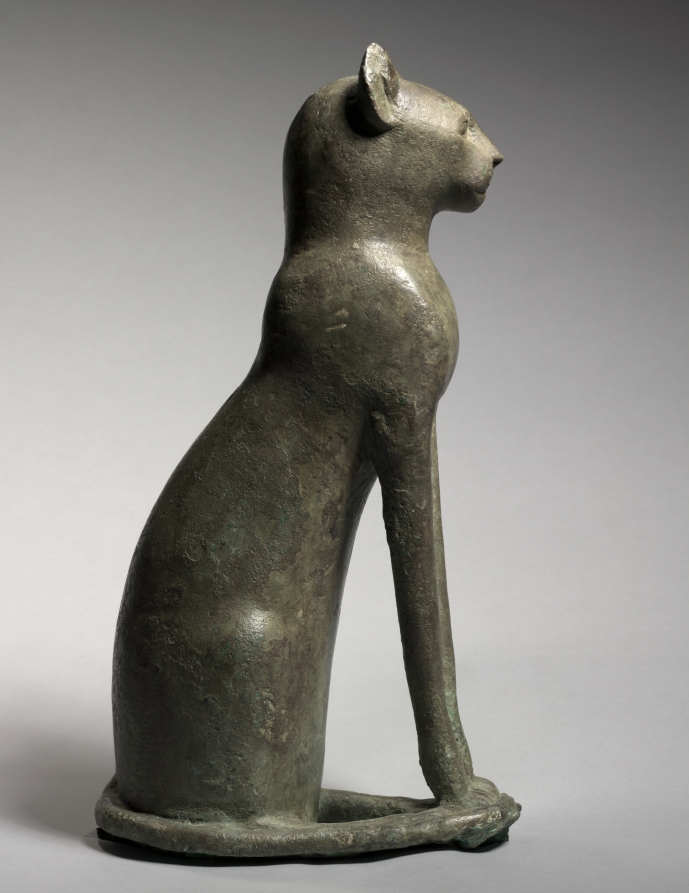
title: Cat Coffin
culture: Egypt, Greco-Roman period (332 BCE–395 CE), Ptolemaic dynasty (305–30 BCE)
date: 305–30 BCE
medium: bronze, hollow cast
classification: Funerary Equipment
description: Although the cat is considered the most Egyptian of animals, as an object of worship the cat does not appear until late in Egyptian history. This unusually large statue of a cat was made to hold the mummified remains of a sacred cat. The coffin is, of course, hollow, with an open bottom. As usual, the animal’s tail is curled around its right side.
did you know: A necklace appears to have been incised or scratched into the finished bronze; faint traces are visible on the chest.